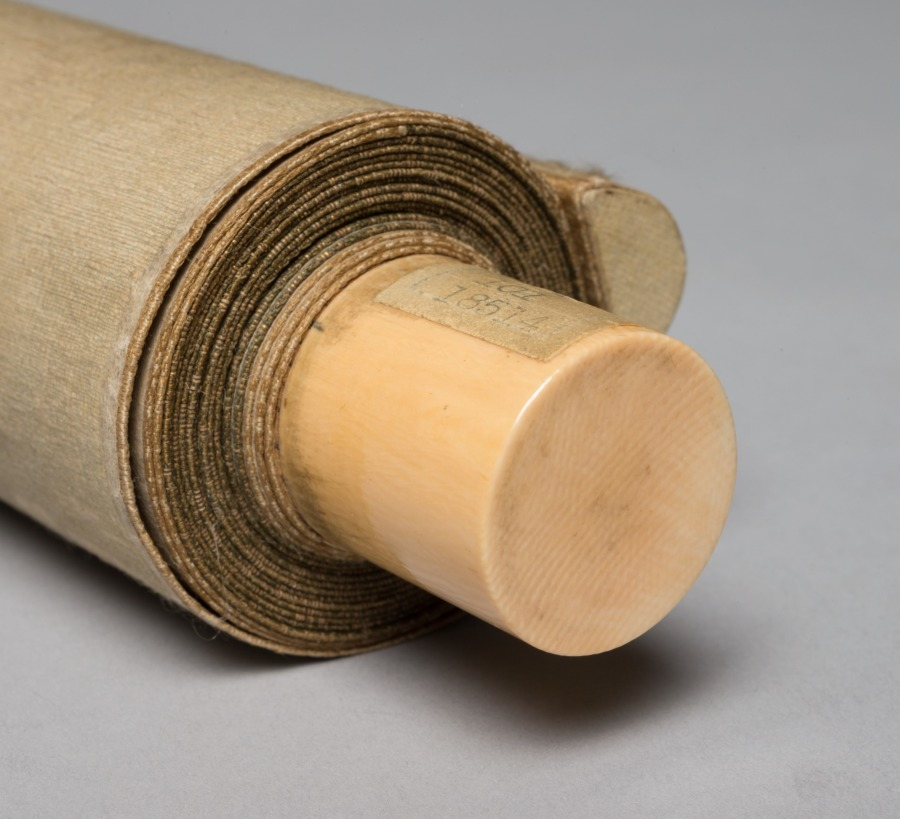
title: Landscape with a Pavilion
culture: Japan, Edo period (1615–1868)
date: c. 1700–1868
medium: hanging scroll; ink on paper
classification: Painting